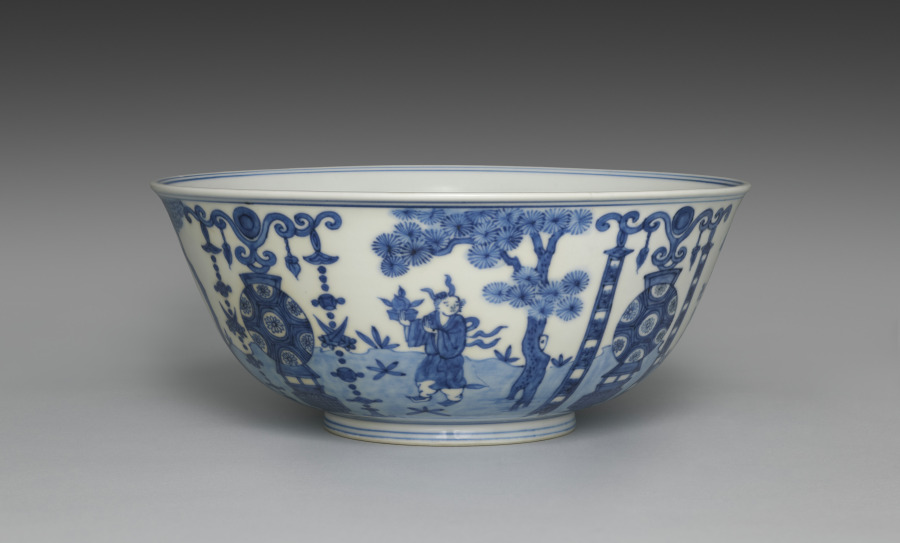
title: Bowl from Nesting Bowls with Daoist Immortals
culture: Japan, Meiji period (1868–1912)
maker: Seifū Yohei III (Japanese, 1851–1914)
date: 1893–1914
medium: Middle bowl from a set of three bowls; porcelain with underglaze blue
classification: Ceramic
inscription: 大日本清風造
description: Yohei III was capable of ink painting–like compositions in underglaze blue, as well as more decorative ones like that on this set of three nesting bowls. Bowls with very similar designs in five colors were produced in the reign of the Wanli emperor (r. 1572–1620 ) during the Ming dynasty, and Yohei must have had direct access to one of these or to a close copy. A scene of Daoist immortals is presented on the bowls. On each one, the ground plane is defined with a blue wash. Four lanterns are evenly spaced around the bowl. Two are flanked with linked-piece metalwork banners of the seven treasures. The alternate altars are adorned with textile banners. In between them are four immortals, each standing beneath a tree with small plants surrounding his feet. Two of the immortals hold fruit on a tray. Another carries an elixir-filled ewer and a willow branch. The fourth holds a swastika (manji), here an auspicious symbol, and a flower. Curiously, the inscription inside each footring reads “Made by Seifu of Great Japan,” in emulation of the dynasty and reign inscriptions that appear on Chinese ceramics; but one can also see through the translucent glaze another inscription, “Seifu Yohei,” written in large characters within a double band of blue on the largest bowl.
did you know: In the bottom of each bowl is a scene of two robed immortals who appear to stand on a precipice in a mountainous landscape high in the clouds, with celestial orbs over their heads.